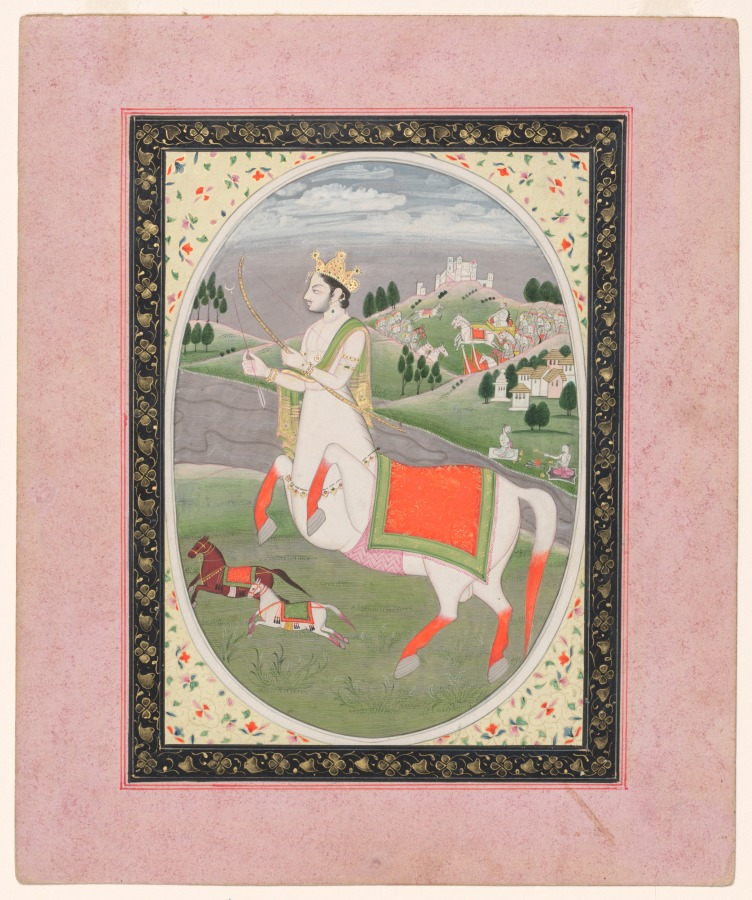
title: Sagittarius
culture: Northern India, Pahari kingdoms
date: c. 1810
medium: gum tempera and gold on paper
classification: Painting